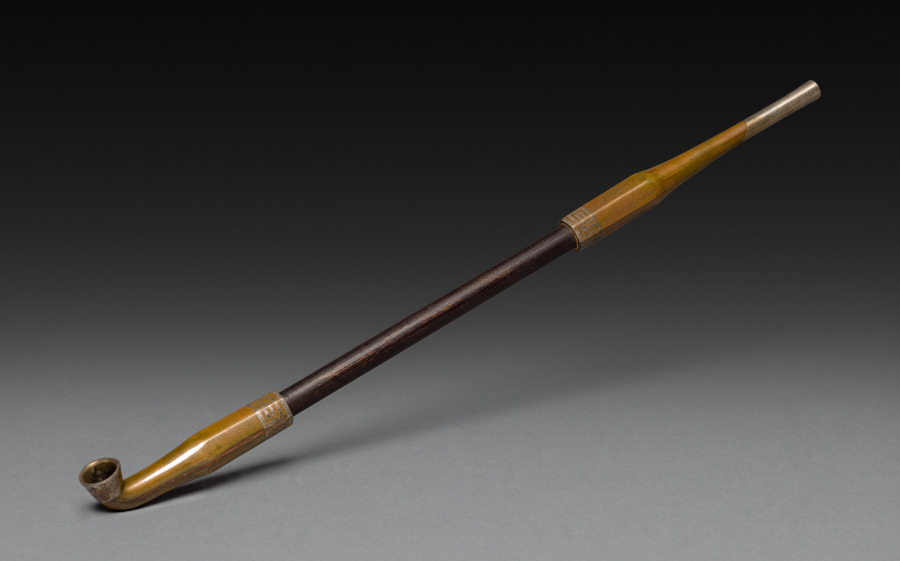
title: Tobacco Pipe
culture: Japan, Edo period (1615–1868)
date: 1700s–mid-1800s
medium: wood and metal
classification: Miscellaneous